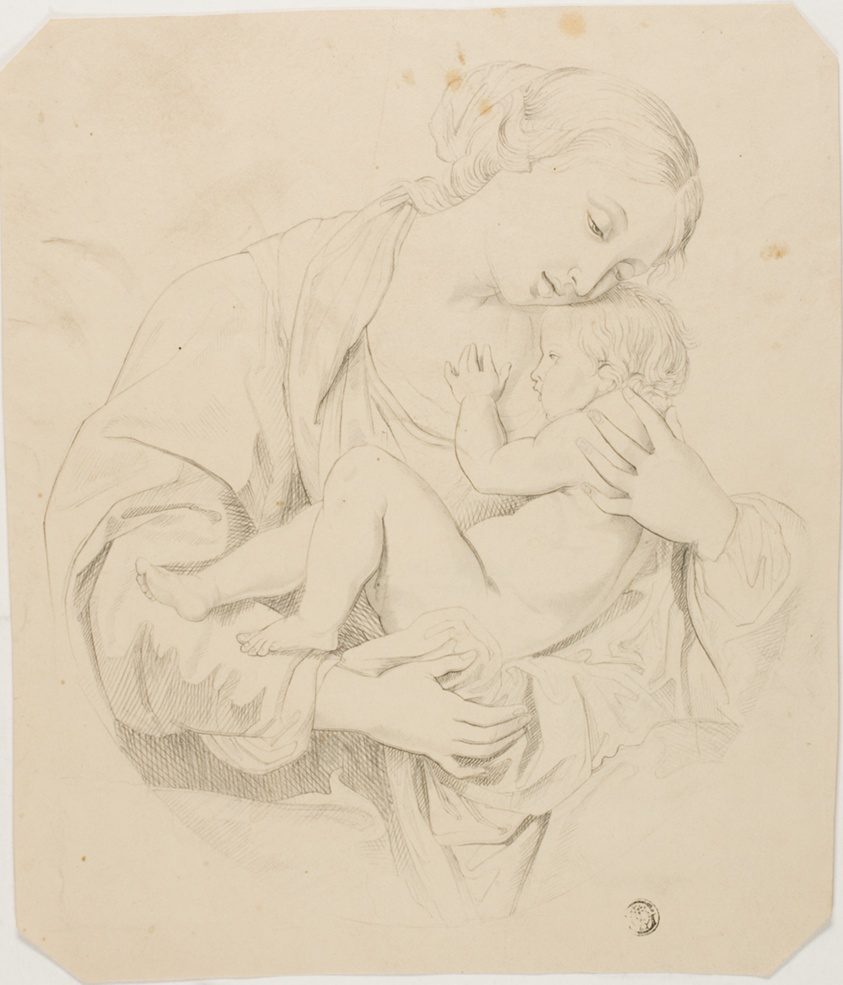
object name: Drawing and Watercolor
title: Mother and Child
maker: Unknown Artist; European, n.d.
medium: Graphite on cream wove paper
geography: Europe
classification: graphite; drawings (visual works); prints and drawing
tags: mothers, children, babies